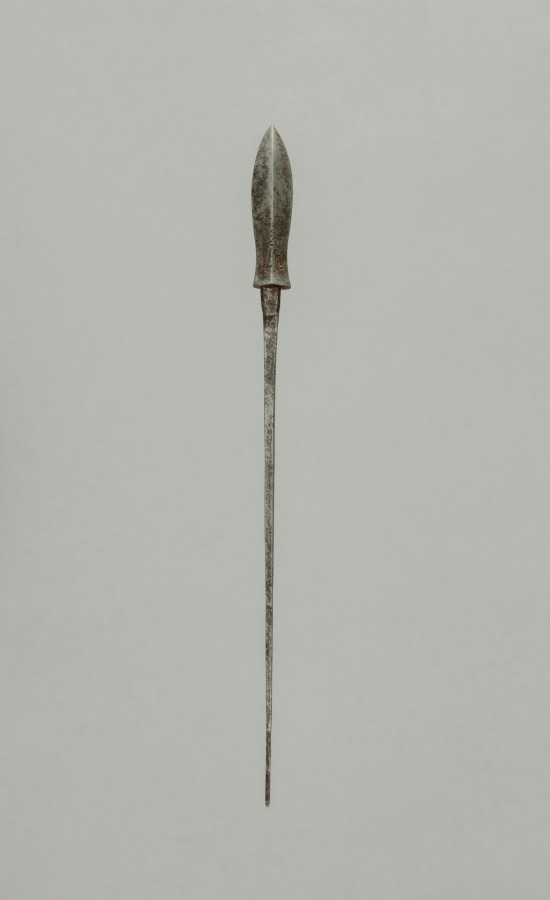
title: Arrow Point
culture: Japan, Edo period (1615–1868)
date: 1700s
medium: steel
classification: Arms and Armor